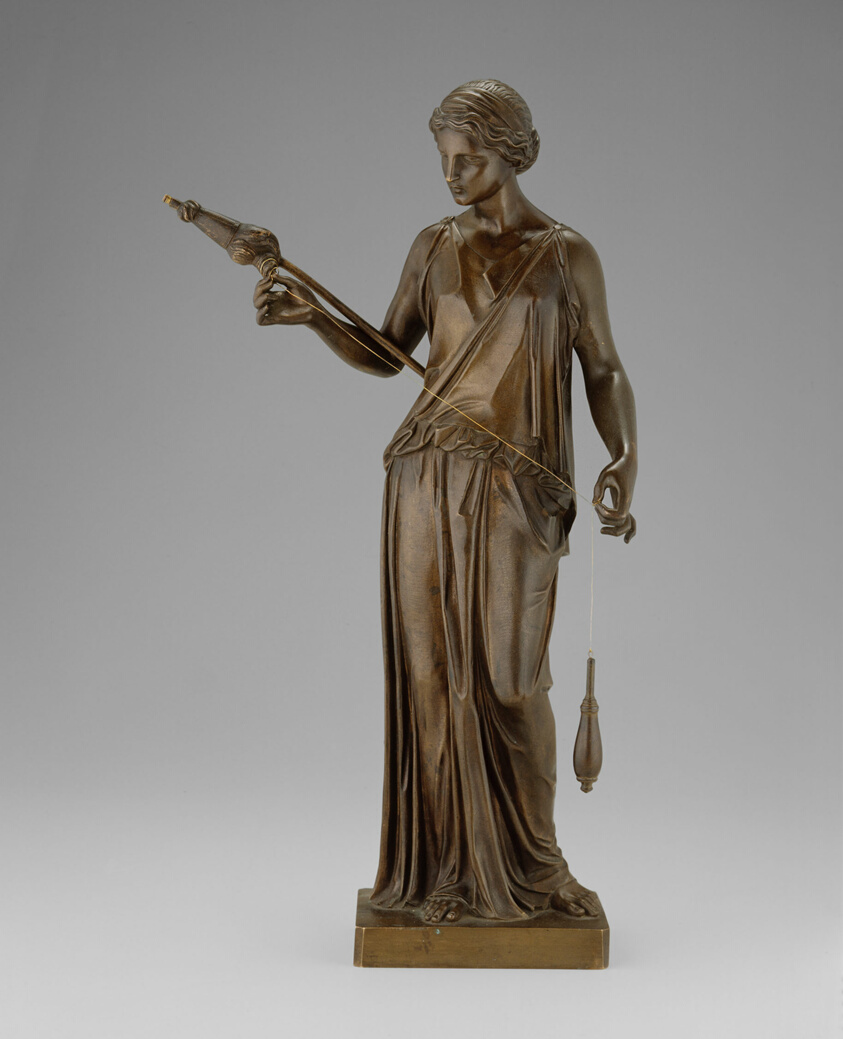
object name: Sculpture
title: The Filatrice (The Spinner)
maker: Henry Kirke Brown (American, 1814–1886); Cast by the artist's foundry; Brooklyn, New York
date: 1850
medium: Bronze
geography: Brooklyn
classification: sculpture; american arts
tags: people, portraits